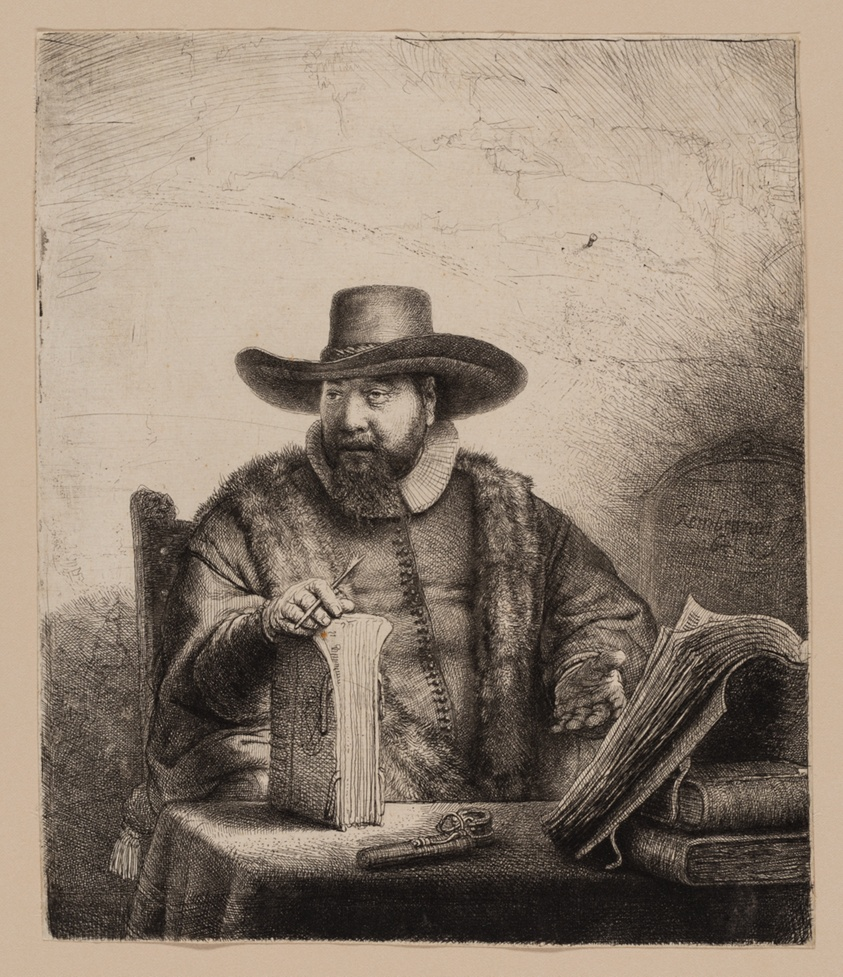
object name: Print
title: Cornelis Claesz. Anslo, Preacher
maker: Rembrandt van Rijn (Dutch, 1606-1669)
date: 1641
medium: Etching and drypoint in black on cream laid paper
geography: Holland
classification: etching; print; prints and drawing; paper; drypoint